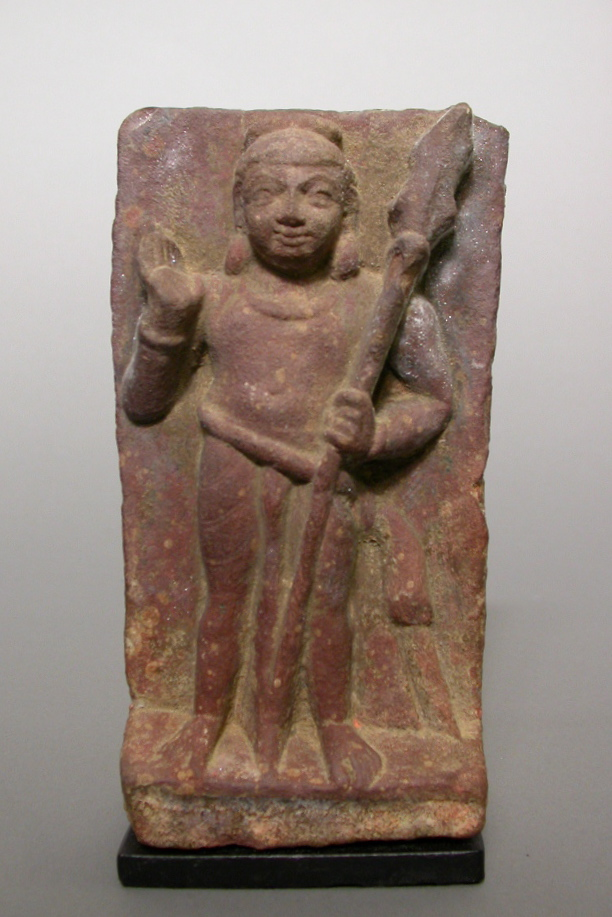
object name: Sculpture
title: Karttikeya, God of War, Holding a Spear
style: South Asian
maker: India; Uttar Pradesh, Mathura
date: 2nd century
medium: Spotted red sandstone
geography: Mathura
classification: stone (unidentified); stone; sculpture; asian art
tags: gods (deities), Hindu, religion, skanda karttikeya